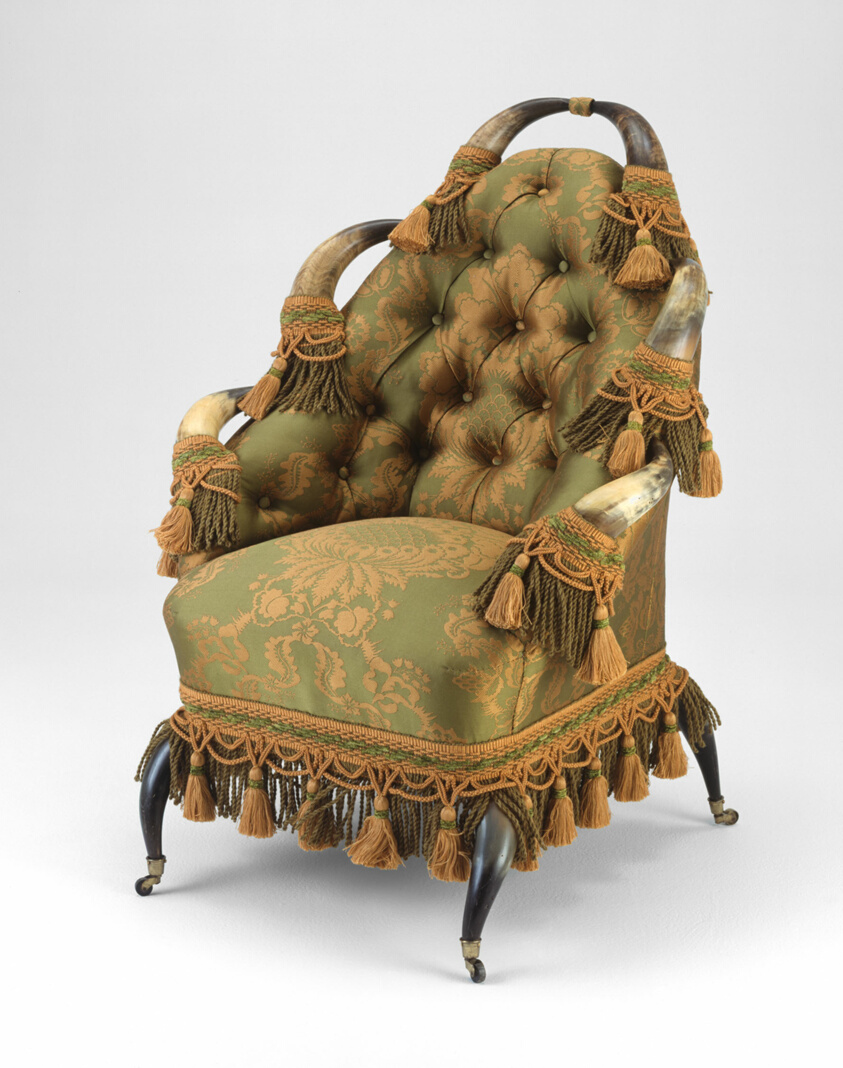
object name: Furniture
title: Steer Horn Armchair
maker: Artist unknown (American, 19th century); Texas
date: 1870–80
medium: Horn, silk, brass, and upholstery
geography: Texas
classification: seating; chair; furniture; american decorative arts; american arts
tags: animals, furniture